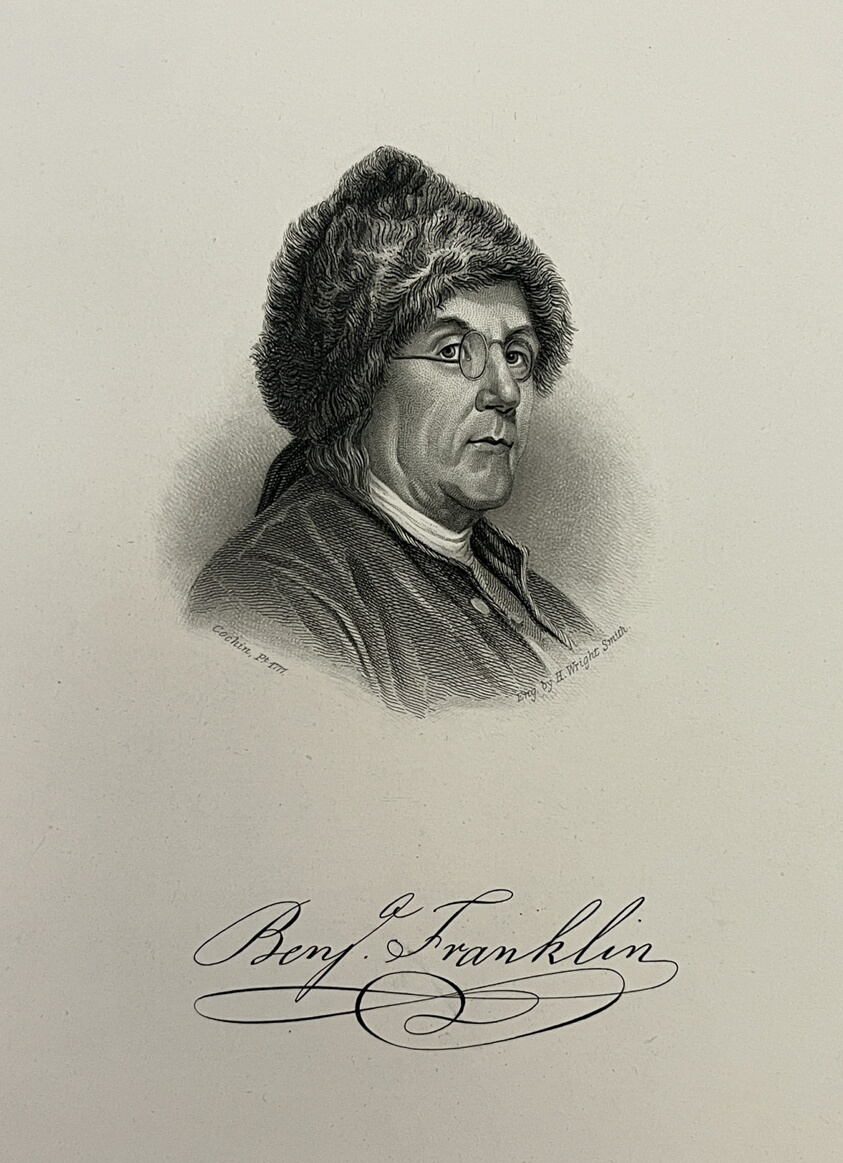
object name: Print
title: Benjamin Franklin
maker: Henry Wright Smith (American, active 1828); after Charles Nicolas Cochin II (French, 1715–1790)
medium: Stipple and line engraving on paper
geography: United States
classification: reproduction; print; prints and drawing